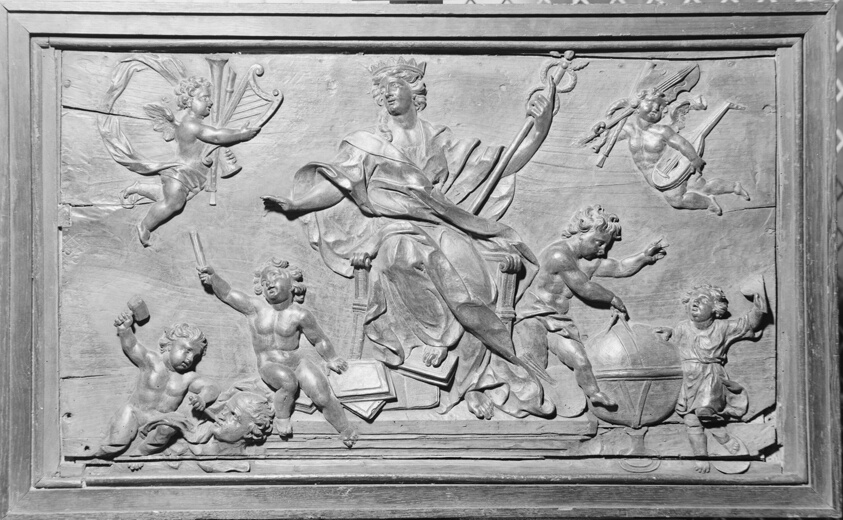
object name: Sculpture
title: Panel Emblematical of the Arts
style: Rococo, european, 17th Century, 18th Century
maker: French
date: 1600/1700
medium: Wood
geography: France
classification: relief; sculpture; french; wood; sculpture/wood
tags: musical instruments, angels, books, crowns, instruments, music, putti, sculpture, Throne, woman